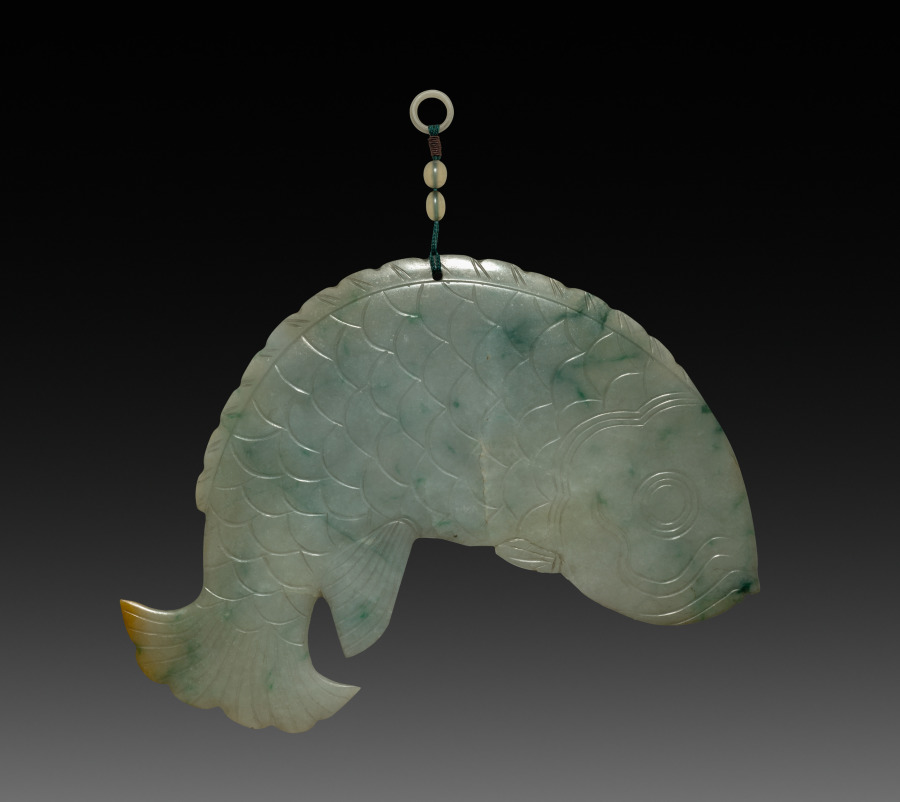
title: Gong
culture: China, Qing dynasty (1644-1911)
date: 1644–1911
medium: jade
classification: Jade